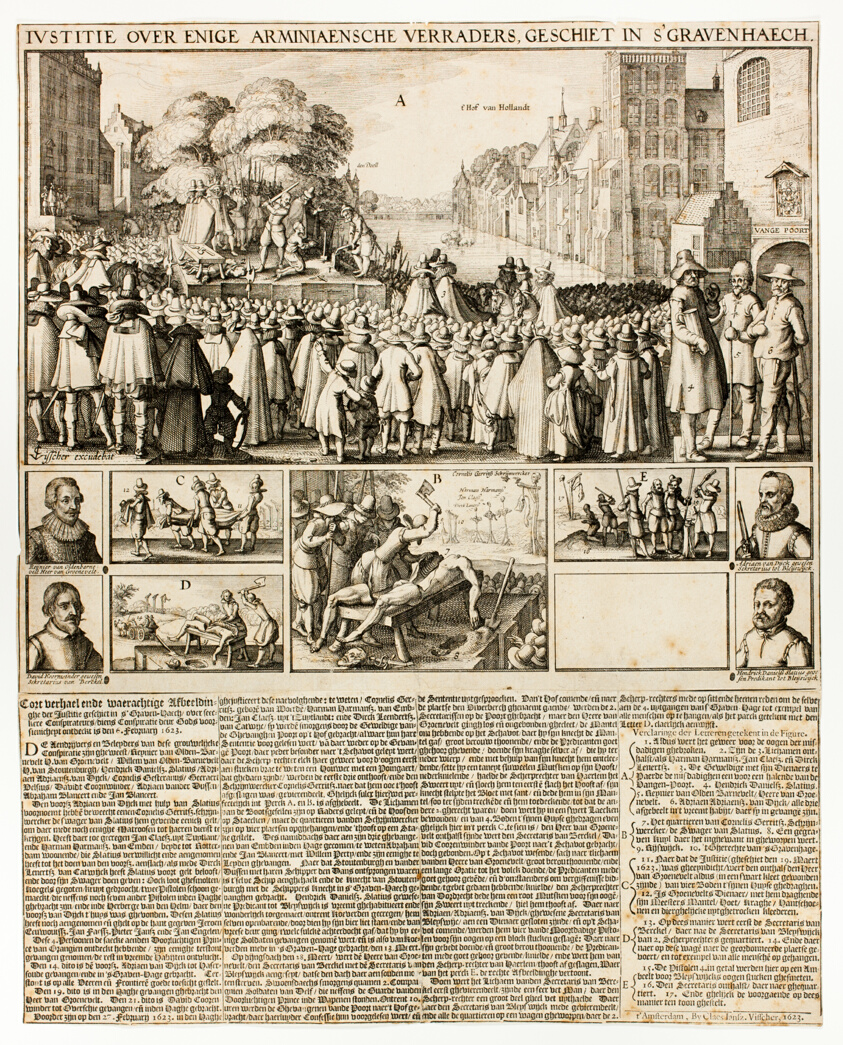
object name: Print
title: Execution of Arminians in The Hague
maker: Claes Jansz. Visscher, II (Dutch, 1586–1652)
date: 1623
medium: Etching with touches of engraving and letterpress in black on ivory laid paper (pieced)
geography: Netherlands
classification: etching; paper; print; prints and drawing